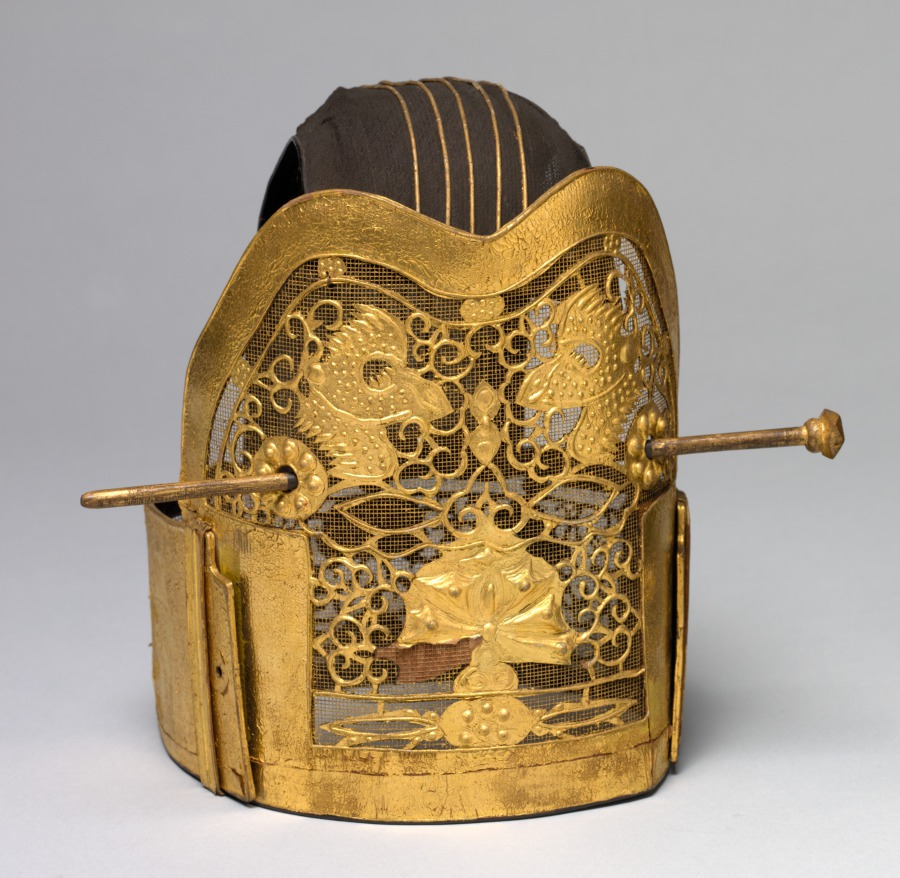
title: Crown for the Royal Ceremonial Costume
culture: Korea, Joseon dynasty (1392–1910)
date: late 1800s–early 1900s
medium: gilded paper, metal wire, and black silk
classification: Garment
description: This is a set of royal ceremonial robe and accessories worn by a high-ranking court official for attending special state ceremonies. The set consists of an inner coat, an outer coat, a skirt, a back apron, a crown, a pair of jade tassels, a tablet, and a belt.